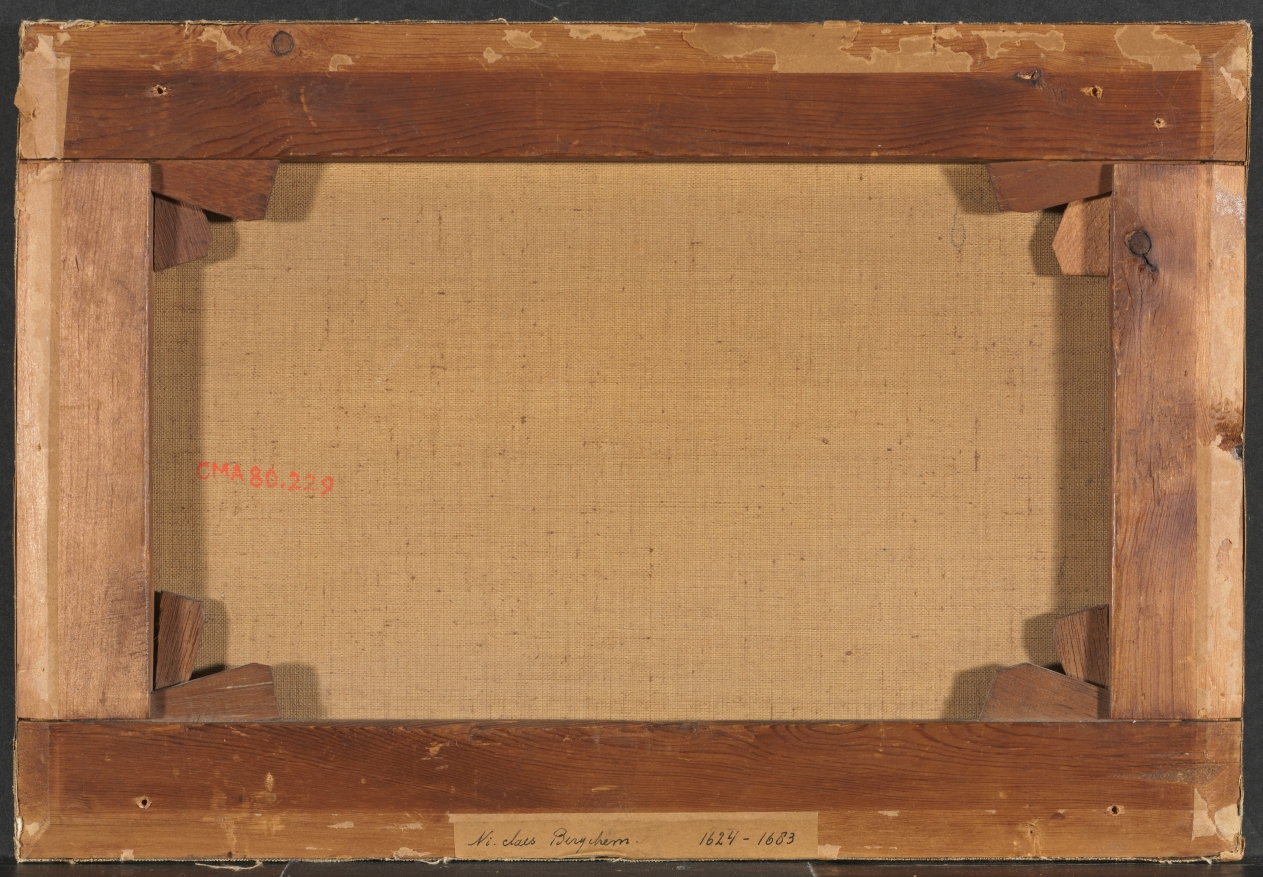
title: Studies of Ram Heads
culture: France, 18th century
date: 1700s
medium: oil on canvas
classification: Painting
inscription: signed lower right: Berchem.